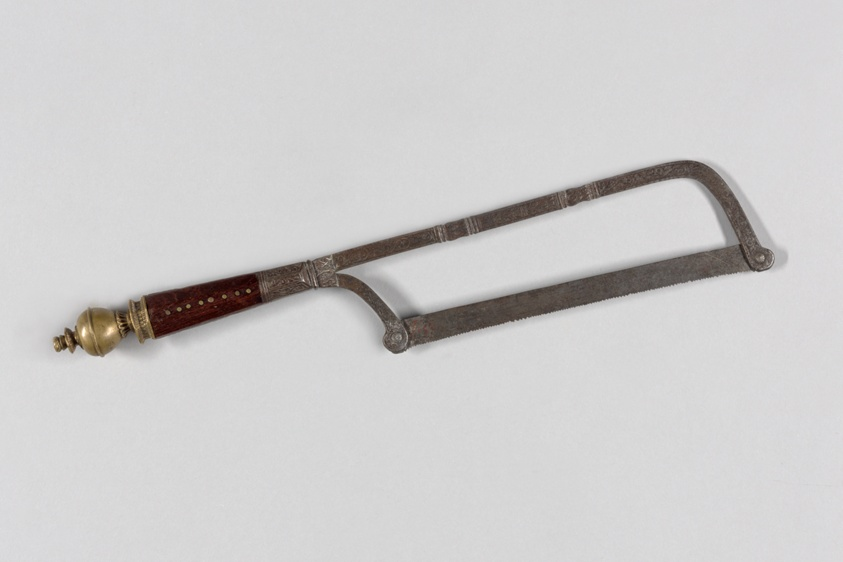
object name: Metalwork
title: Bone Saw from a Hunting Trousse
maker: France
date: c. 1570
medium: Steel, brass, and fruitwood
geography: France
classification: tool; european decorative arts; metalwork